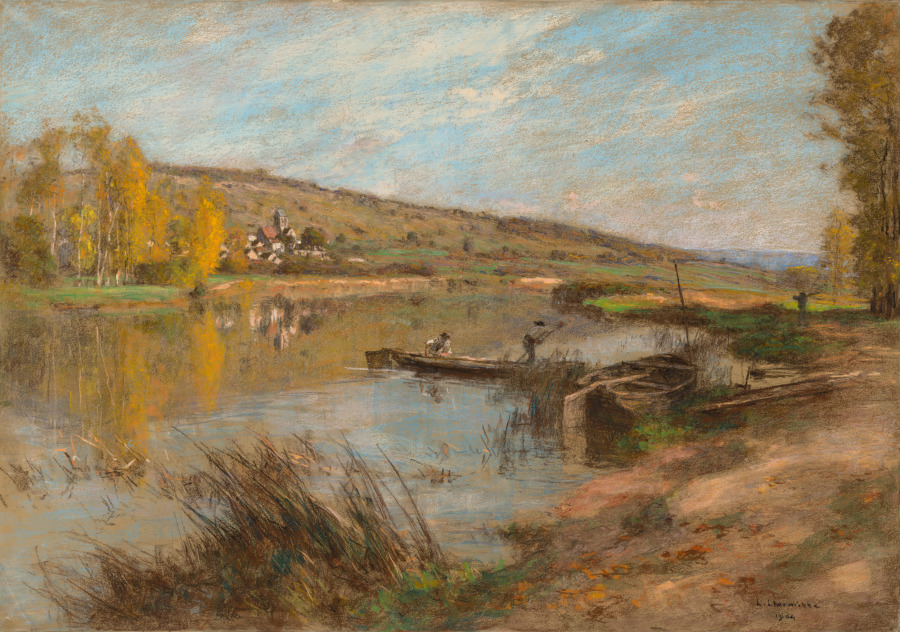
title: Quai au Sable, Chartèves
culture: France, 20th century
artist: Léon Augustin Lhermitte (French, 1844–1925)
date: 1904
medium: pastel on gray wove paper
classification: Drawing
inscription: inscribed, lower right, in black pastel: L. Lhermitte / 1904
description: Like many of Léon-Augustin Lhermitte’s pastels, this drawing shows the Marne River in northeastern France. Such artworks were created both because of the artist’s attraction to the subject and due to their marketability. Drawing from memory, Lhermitte worked in his studio, producing a complex range of marks with pastel crayon on densely textured paper and even manipulating the powdery material with brushes and sponges. Although his comparatively traditional style did not align with artistic movements of his time, it was hugely popular around 1900—especially in the United States, where the hardworking laborers that populated his landscapes appealed to industrialist collectors.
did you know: Lhermitte received a stipend from his hometown Mont-Saint-Père to study in Paris.